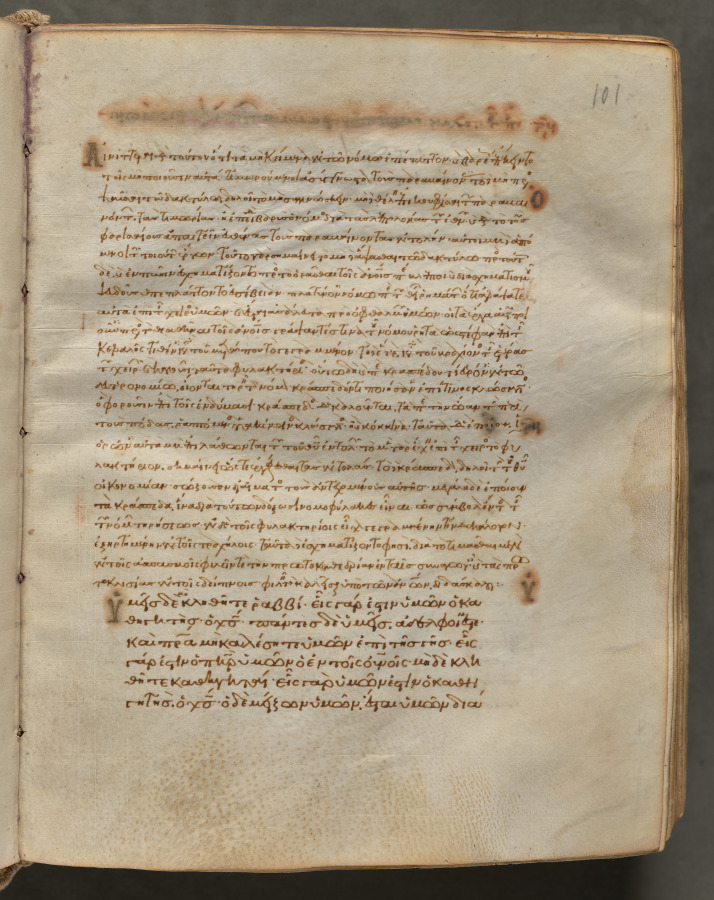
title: Text, folio 101 (recto), from a Gospel Book with Commentaries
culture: Byzantium, Constantinople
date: c. 1000–1100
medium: ink, tempera, and gold on vellum; leather binding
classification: Bound Volume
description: Each of the four gospels in this book opens on a page with brilliantly illuminated borders depicting the author of the text as well as birds-principally peacocks, symbols of the immortality of the soul-and fountains, representing the fountain of life and the salvation of the soul. This volume consists of 428 leaves with texts in Greek. Its level of sophistication suggests that it was probably written and decorated in a monastery in Constantinople.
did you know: Gospel Books were carried in procession through Byzantine churches.